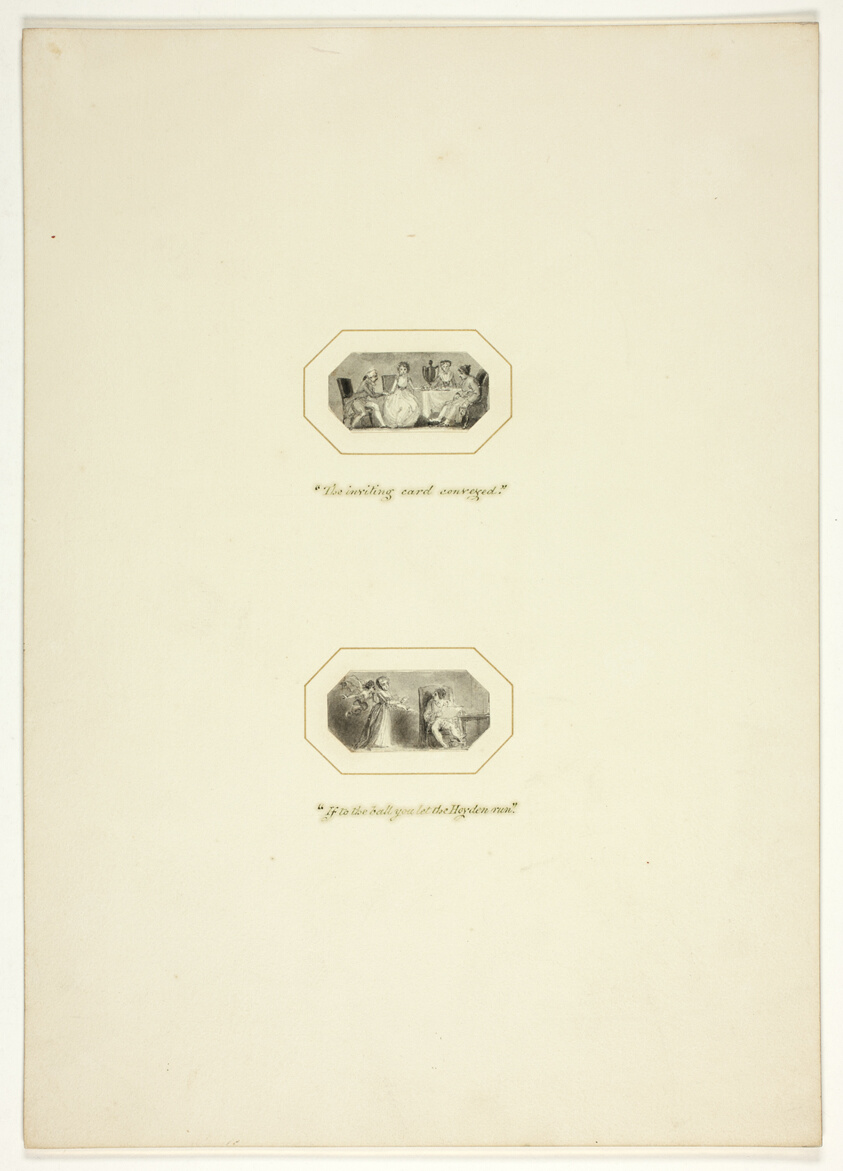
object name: Drawing and Watercolor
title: Study for a plate from The Triumphs of Temper, in the 1796 Royal Engagements Pocket Book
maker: Thomas Stothard (English, 1755-1834)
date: c. 1795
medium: Ink wash on paper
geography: England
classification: ink or chalk wash; drawings (visual works); prints and drawing